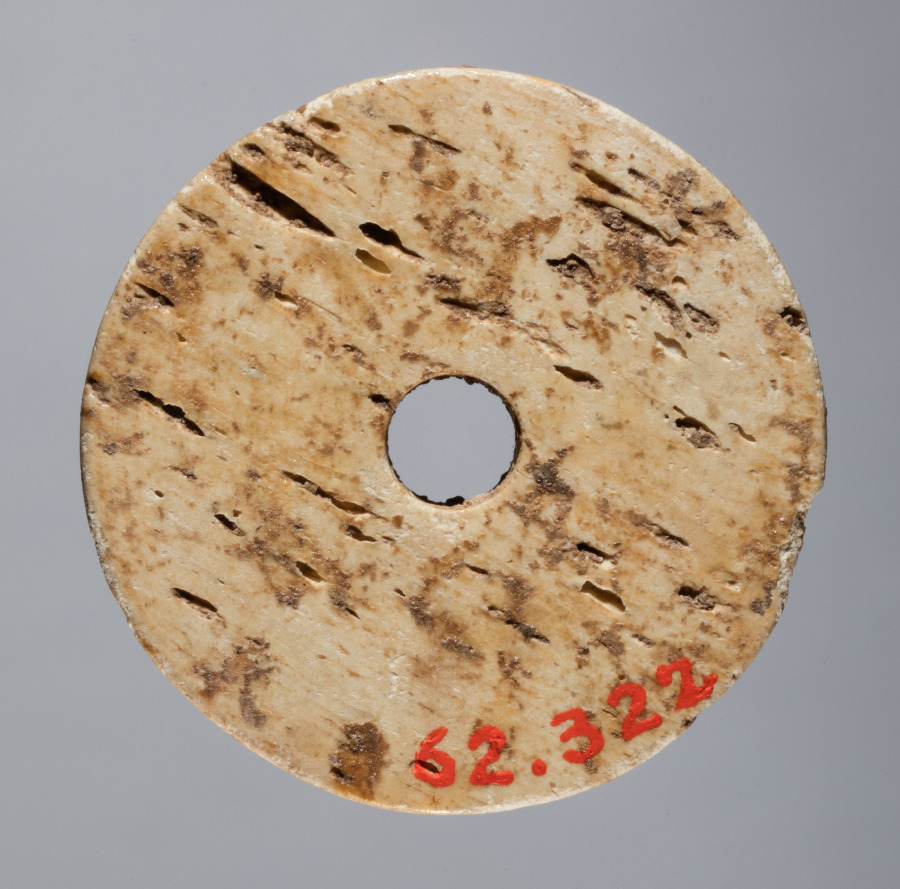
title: Spindle Whorl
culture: Iran, early Islamic period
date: 700s - 900s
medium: bone, incised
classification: Spindle Whorl